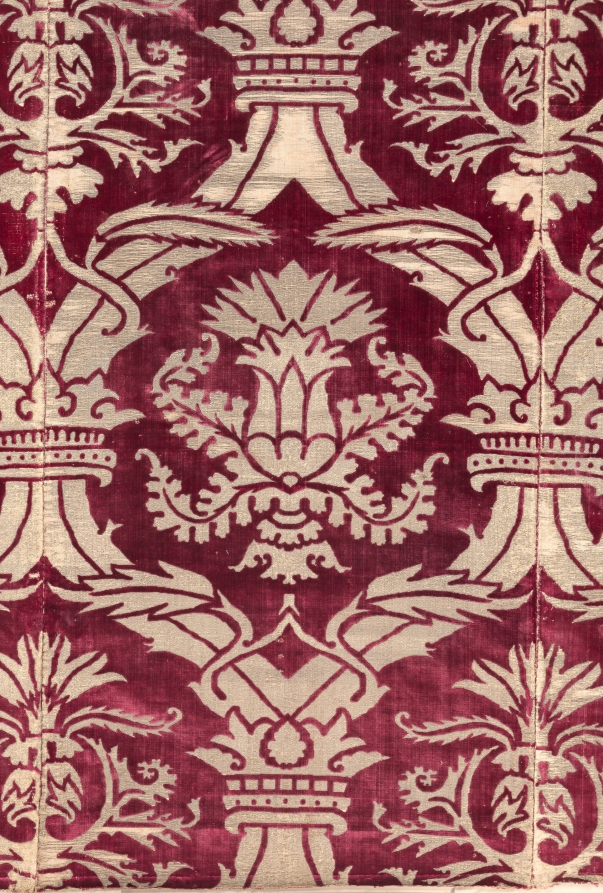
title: Brocaded Velvet Panel with Italianate Pattern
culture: Turkey, Istanbul or Bursa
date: 1575–1625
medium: Silk: velvet, brocaded; gilt-metal thread and cotton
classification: Velvet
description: Rarely are four fabric widths preserved together from any culture. This gilt-metal thread pattern combines Turkish and Italian features: the large ogival (curved) lattice clasped by crowns and the velvet structure are Turkish, and the two so-called artichoke designs are enlarged adaptations of Italian motifs. A symbol of wealth and power, this velvet panel was woven during the artistic height of the Ottoman Empire in the late 1500s. It may have covered a divan (sofa) or possibly enhanced a wall during cold winters in the imperial Topkapi Palace in Istanbul.